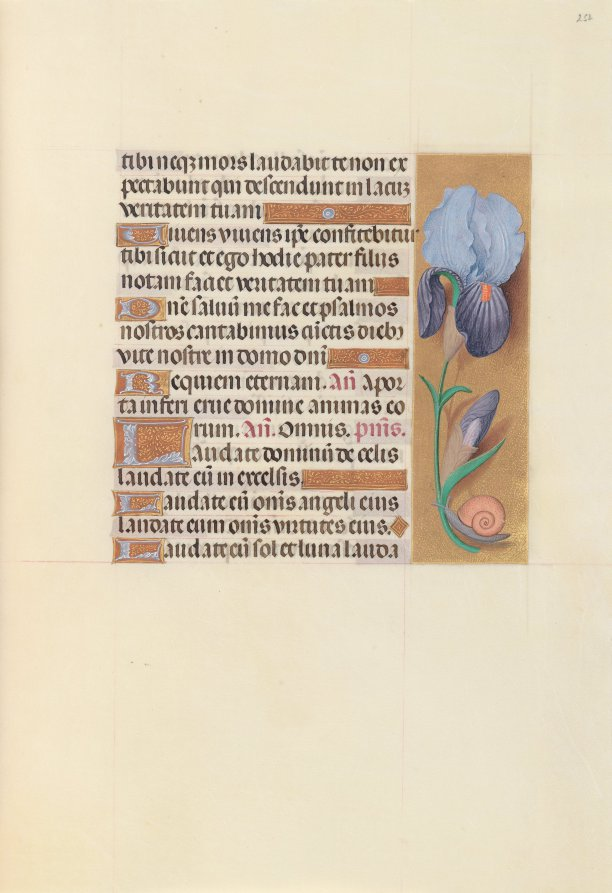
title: Hours of Queen Isabella the Catholic, Queen of Spain: Fol. 252r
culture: Flanders, Ghent and Bruges, late 15th century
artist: Master of the First Prayerbook of Maximillian (Flemish, c. 1444–1519)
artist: and Associates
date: c. 1500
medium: ink, tempera, and gold on vellum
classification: Bound Volume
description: This manuscript was illuminated by a circle of at least five highly organized manuscript painters active in the Flemish cities of Ghent and Bruges. The principal illuminator was Alexander Bening, who painted the majority of the book's miniatures. Manuscripts produced by this circle of artists are renowned for the decoration of their borders, which typically feature a rich variety of realistically-painted flowers, birds, and butterflies. This prayer book, called a book of hours, was intended not for a cleric, but for the private devotions of a lay person-in this case, Isabella the Catholic, Queen of Spain (1451-1504). Isabella's coat of arms embellishes the book's frontispiece. It is unlikely that the book was commissioned by the Queen herself; rather, she probably received it as a diplomatic gift from someone courting her patronage, perhaps Cardinal Francisco Jimenez de Cisneros. A Franciscan friar, Jimenez was dependent upon Isabella for his advancement, first to the post of Queen's confessor in 1492, and then to Archbishop of Toledo in 1495.